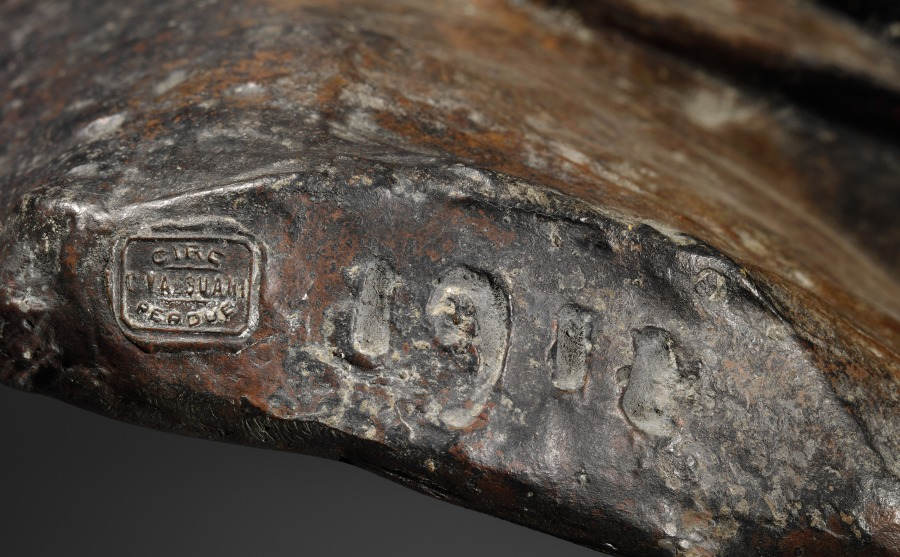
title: Claude Monet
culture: France, 20th century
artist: Paul Paulin (French, 1852–1937)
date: late 1800s-early 1900s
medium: bronze, marble base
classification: Sculpture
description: Paul Paulin was a renowned Parisian dentist who had a passion for sculpting and was encouraged by Edgar Degas to pursue an artistic career. Paulin is best known for his portrait busts of notable Impressionists. There are related versions of this portrait bust of the celebrated painter Claude Monet at three museums in Paris: the Petit Palais (plaster), the Musée d'Orsay (bronze), and the Musée Rodin (bronze).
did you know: In addition to Claude Monet, Paul Paulin also made portrait busts of Edgar Degas, August Renoir, Camille Pissarro, and Auguste Rodin.